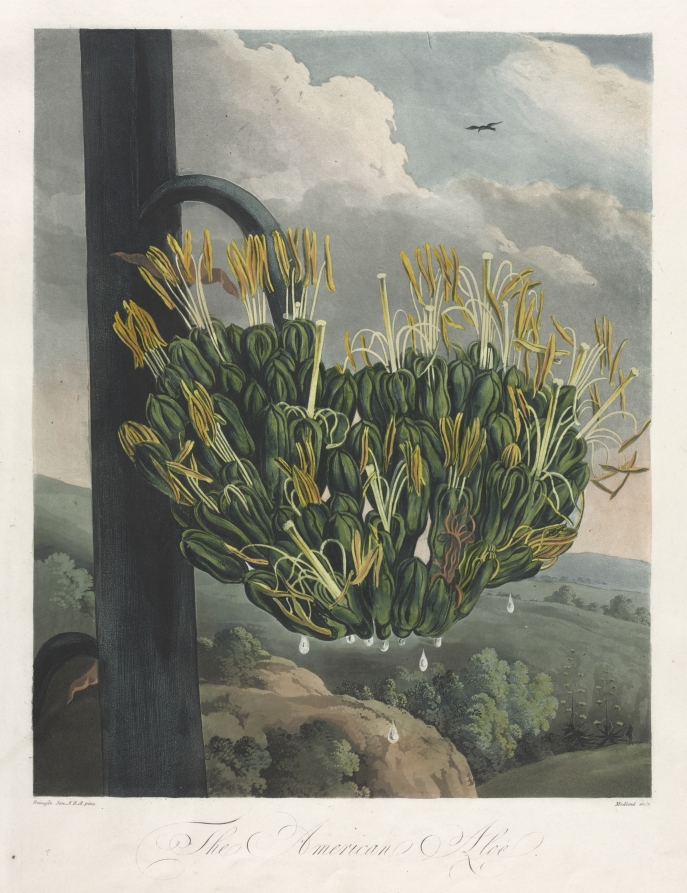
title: The Temple of Flora, or Garden of Nature: The American Aloe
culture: England, late 18th-early 19th Century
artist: Robert John Thornton (British, 1768–1837)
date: 1807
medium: aquatint, stipple and line engraving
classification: Print